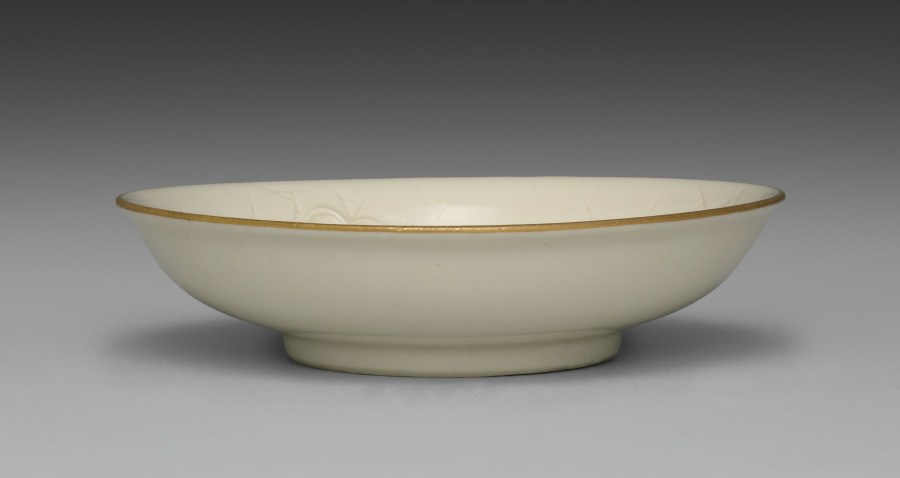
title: Small Dish from Dining Set with Plum Blossoms and Cracked-Ice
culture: Japan, Meiji period (1868–1912)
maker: Seifū Yohei II (Japanese, 1844–1878)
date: c. 1875–78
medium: Porcelain with molded designs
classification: Ceramic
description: Each item in this set has a delicate low-relief design of flowering plum branches over scattered, intersecting lines meant to resemble the cracked-ice surface of a frozen body of water and is signed on the base in gold pigment. While Yohei II produced many fine works in underglaze blue, like those produced by Kiyomizu Shichibei, he also made works in quite different styles later in his career, from the early 1870 s. In 1873, he was appointed purveyor to the Industrial Center of Kyoto Prefecture, a designation associated with Kyoto’s efforts to reach an international market through the port of Kobe; and from 1875 until his death, he was involved in national-level projects to present Japanese ceramics across the world. It was during this period that Yohei III was apprenticed to Yohei II, and it has been suggested that this set may in fact be an early example of Yohei III’s work, which he signed with his teacher’s name. Decorated with flowers resembling Japanese textile motifs, the set calls to mind the design of Yohei II’s pair of vases with plum blossoms in the Victoria and Albert Museum. Here, the elaborate trees created for a formal public exhibition setting have been translated into the approachable blossoms of the genteel domestic environment. While the designs are consistent across the pieces, each raised flower petal and pistil and each incised line in the ice was done by hand, so the cups, bowls, and dishes are similar yet unique. The bottoms of two boxes once identified the set’s owner, but the information has been deliberately obscured with black ink. However, inscriptions still visible appear to indicate two occasions, once at the end of July 1886 , and once again in June 1916 , when parts of the set were requested from Hokura in Niigata Prefecture. The location corresponds to a neighborhood in the present-day city of Jōetsu. The surname Tsuji 辻 also appears on a paper tag affixed to one of the box cloths. Future research may possibly reveal more about their provenance. A vase by Yohei III in a private collection combines the formal grandeur of the Yohei II vases in the Victoria and Albert Museum with the gentler design of this dining set, placing flowering plum trees against soft, scalloped-edge clouds resembling those in golden screens.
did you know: The dining wares have a creamy white coloration that the four boxes containing them identify as Korean in style.